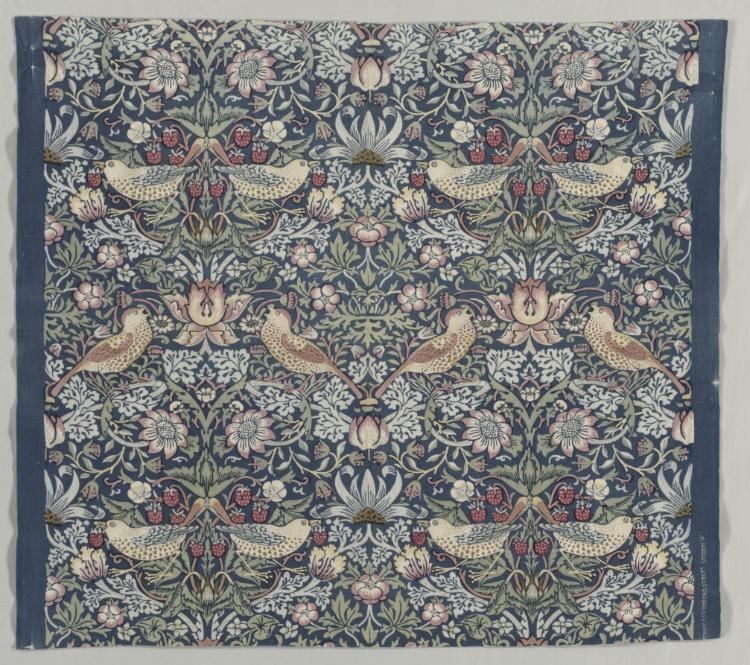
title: Strawberry Thief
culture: England, Merton Abbey, 20th century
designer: William Morris (British, 1834–1896)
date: c 1936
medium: plain weave cotton, discharge printed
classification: Textile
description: Perhaps the most recognizable of Morris’s textiles, Strawberry Thief celebrates the thrushes in Kelmscott Manor’s garden. May Morris remarked, “You can picture my Father going out in the early morning and watching the rascally thrushes at work on the fruit beds and telling the gardener who growls, ‘I’d like to wring their necks!’ that no bird in the garden must be touched.” With Strawberry Thief, Morris perfected the indigo-discharge process, which required the entire cloth to be dyed blue before it was bleached and block printed, in this case with more colors than any of his other textiles.